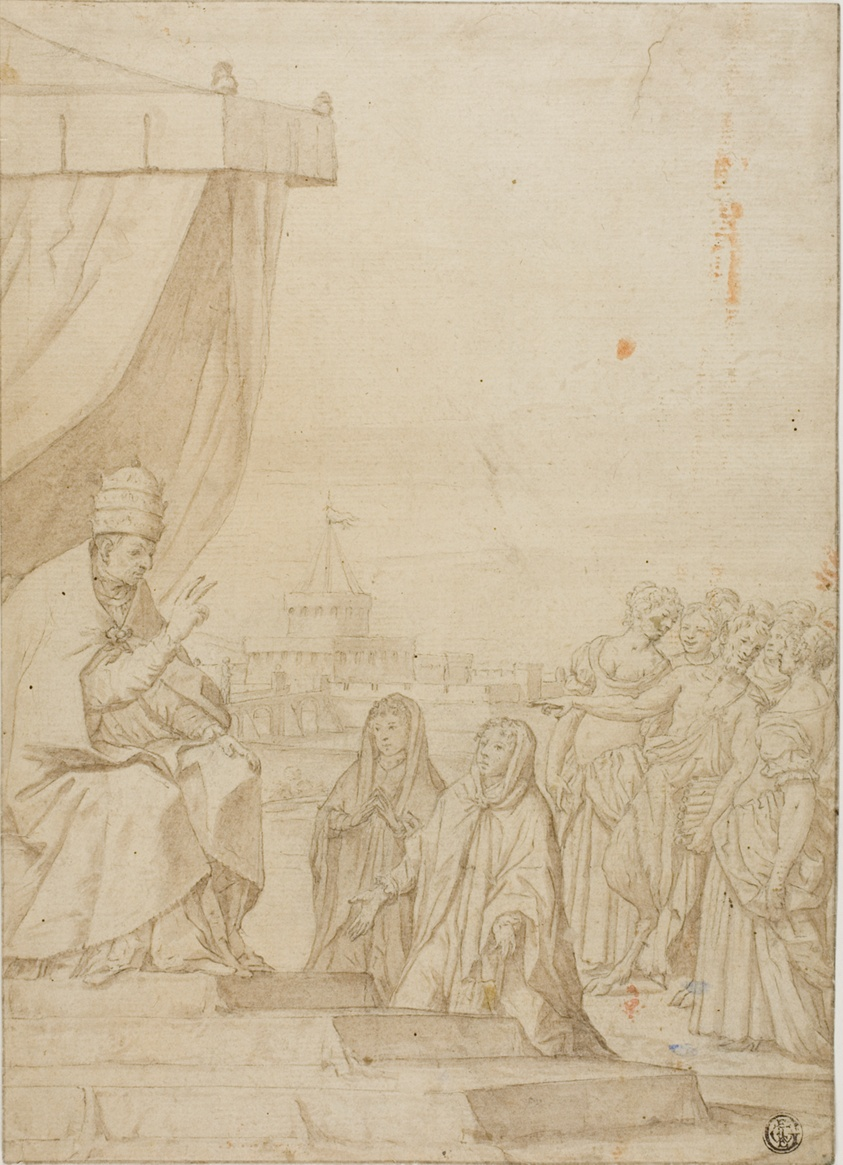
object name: Drawing and Watercolor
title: Pope Blessing Two Women in the Presence of Satyr and Assembled Women with Castel Sant Angelo in the Background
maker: After Federico Zuccaro; Italian, c. 1542-1609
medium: Pen and brown ink with brush and brown wash, heightened with white gouache, over black chalk, on buff laid paper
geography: Italy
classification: pen and ink drawings; drawings (visual works); prints and drawing